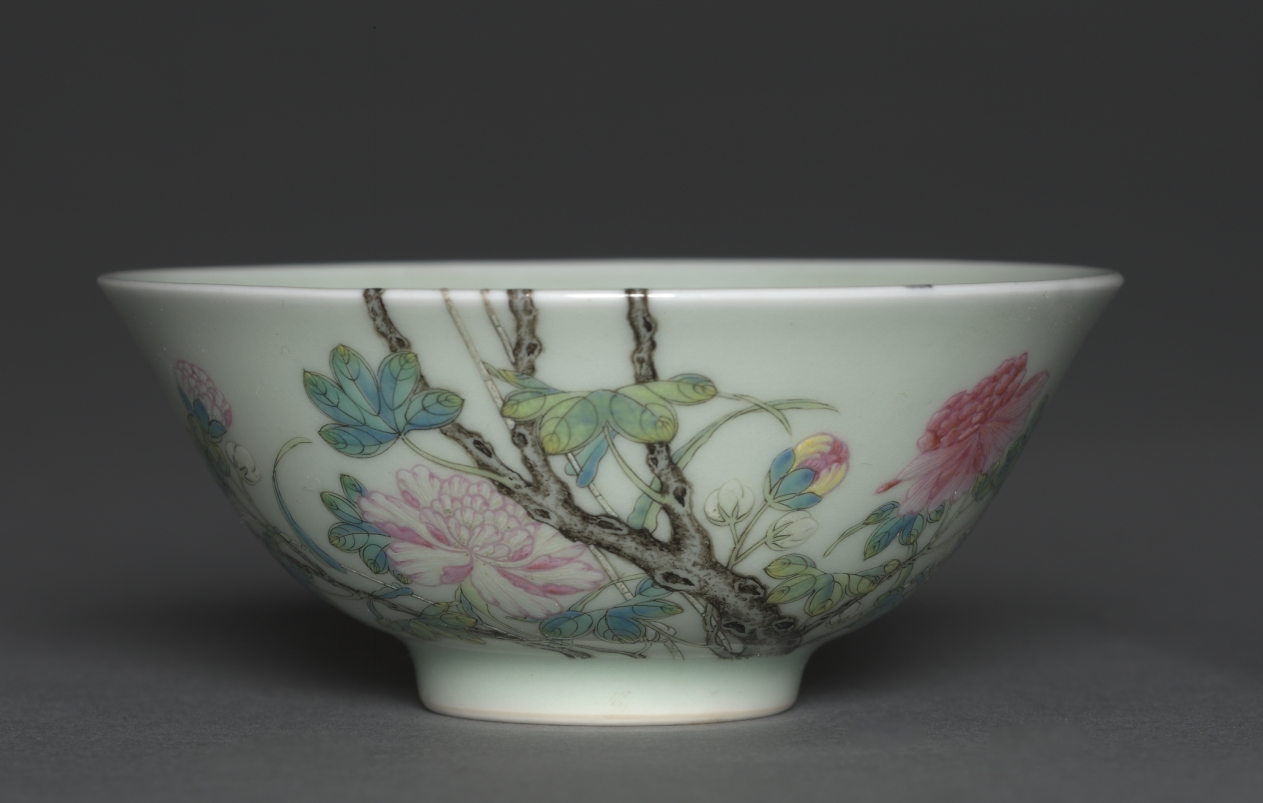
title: Bowl with Bamboo, Tree Peony, and Swallow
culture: China, Jiangxi province, Jingdezhen kilns, Qing dynasty (1644-1911), Yongzheng mark and reign (1723-35)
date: 1723–35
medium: porcelain with famille rose overglaze enamel decoration and celadon glaze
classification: Ceramic